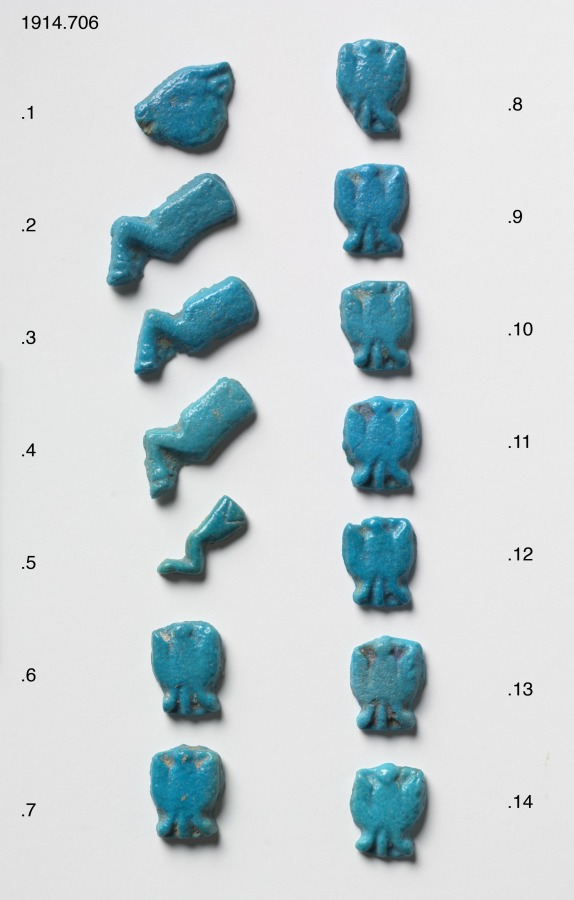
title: Food Model Amulets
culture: Egypt, New Kingdom (1540–1069 BCE), Dynasties 19–20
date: 1295–1069 BCE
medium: turquoise faience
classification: Amulets